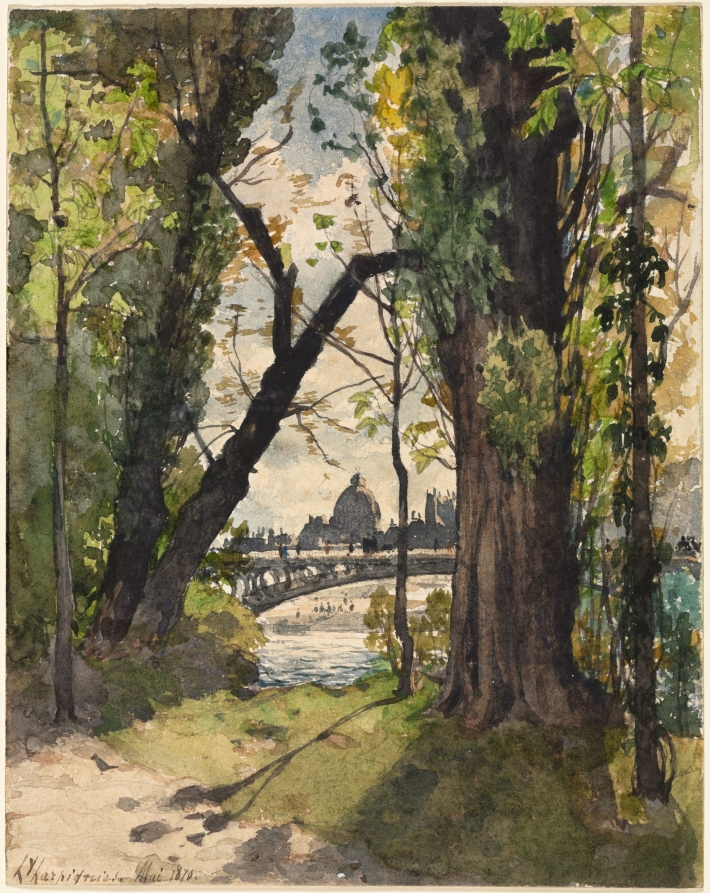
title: View of the Institut de France from the Foot of the Pont Royal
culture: France, 19th century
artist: Henri Joseph Harpignies (French, 1819–1916)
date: 1870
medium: watercolor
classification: Drawing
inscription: signed, lower left, in brown watercolor: h j harpignies Mai 1870. ; VERSO, lower center, in graphite: 38 3 [last 3 underlined and superscript] x 45 3 [3 underlined and superscript] ; lower center, in black ink: [li?] 3308 vx/sx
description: This watercolor belongs to a series of views of Paris which Harpignies painted just before the beginning of the Franco-Prussian War. Although Harpignies is often placed with the artists of the Barbizon school, he did not work in Fontainebleau—although he was influenced by the compositions of Camille Corot (also in this gallery). A talented and influential watercolorist, Harpignies’s primary subjects were landscapes and views of Paris. In this sheet, the artist records a view from the Bois de Boulogne, a famous park on the western edge of Paris.